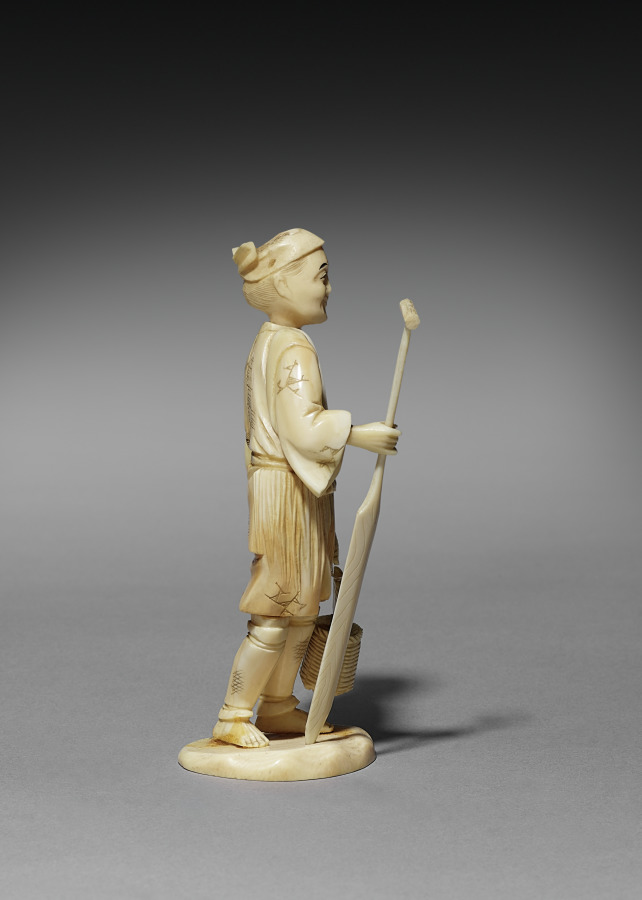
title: Man with a Basket and Paddle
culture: Japan, Meiji period (1868–1912)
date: late 1800s-early 1900s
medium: ivory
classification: Ivory